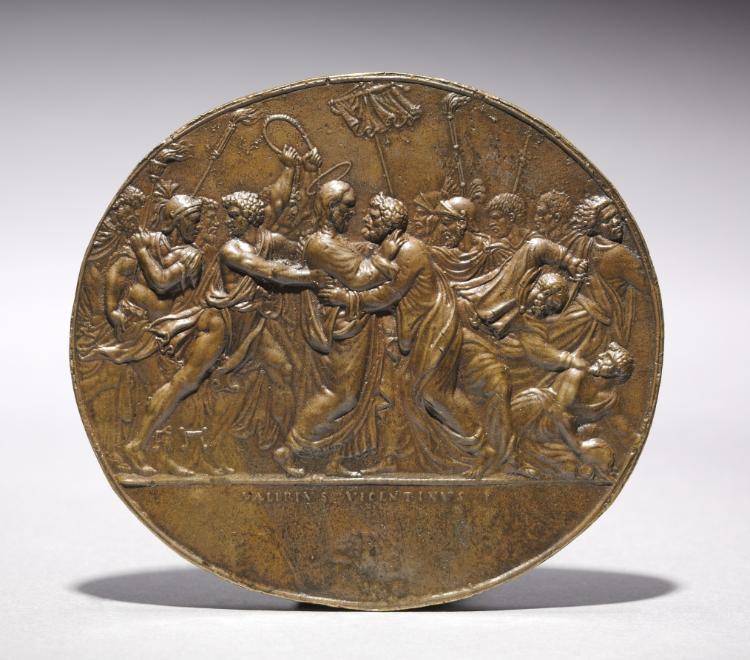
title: The Betrayal of Christ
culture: Italy, 16th century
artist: workshop of Valerio Belli (Italian, c. 1468–1546)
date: c. 1525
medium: bronze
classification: Sculpture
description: Born in Vicenza, Belli worked in Rome as a successful crystal and gem engraver, goldsmith, and medalist. His bronze plaquettes come almost without exception from crystal or hardstone carvings. This particular plaquette directly derives from a rock crystal intaglio by Belli bearing the same inscription in the Biblioteca Apostolica Vaticana, which originally was mounted with two other oval medallions of Christ Carrying the Cross and the Entombment in the silver-gilt base of a rock crystal crucifix, also in the collection of the Vatican Library. This crucifix is generally identified as the one, according to Vasari, created for Clement VII for which Belli received a payment of 1,111 gold ducats in 1525.